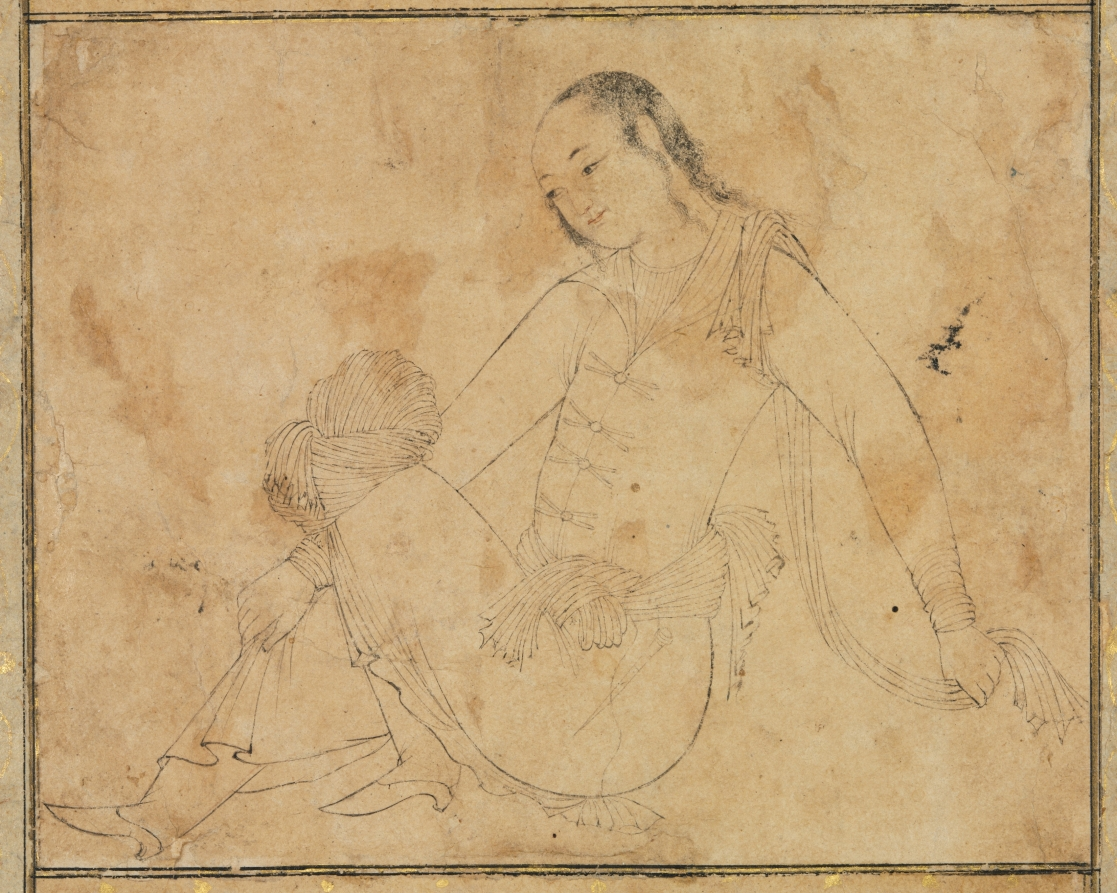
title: Sketch of a Young Man and Persian Calligraphy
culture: Iran, Isfahan, Safavid period (1501-1722)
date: 1630–50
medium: opaque watercolor, ink, and gold on paper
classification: Drawing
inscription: script: Nasta'liq